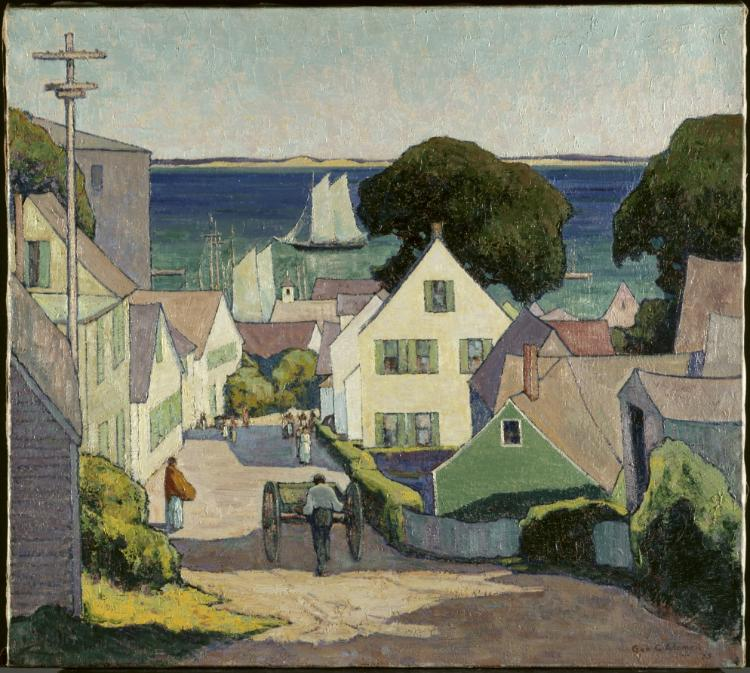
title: Down to the Harbor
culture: America, Ohio, Cleveland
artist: George G. Adomeit (American, born Kingdom of Prussia [now Lithuania], 1879–1967)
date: 1925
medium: oil on canvas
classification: Painting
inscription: signed lower right: Geo. G. Adomeit '25.